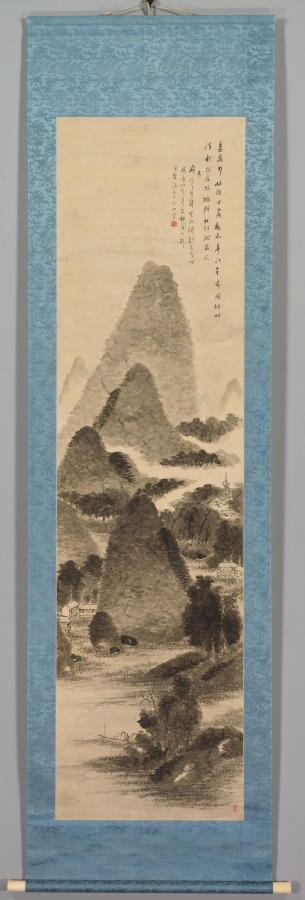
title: Mountain View and Blue Water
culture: Japan, Edo period (1615–1868)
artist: Tanomura Chikuden (Japanese, 1777–1835)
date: early 1800s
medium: hanging scroll; ink, color, and gold on paper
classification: Painting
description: Tanomura Chikuden was an eminent painter whose adopted son, Tanomura Chokunyū (1814–1907), was Seifū Yohei III’s painting teacher. This work was displayed at a gathering commemorating the 10th anniversary of Chokunyū’s death, something we know only because its custom-made box and archival documents have been carefully kept together. The box inscription also confirms that Chikuden was emulating the style of the Mi family of painters, active during China’s Southern Song dynasty (1127–1279). The painting’s Chinese-style silk wrapper is inscribed and sealed on its interior by members of Chokunyū’s community.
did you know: The mountain shapes are built up with multiple small wet strokes.